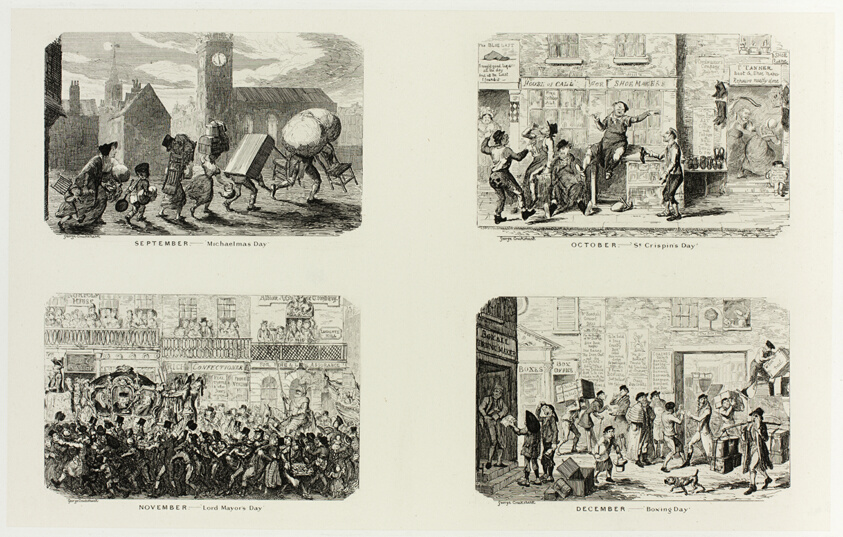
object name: Print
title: September – "Michaelmas Day" from George Cruikshank's Steel Etchings to The Comic Almanacks: 1835-1853 (top left)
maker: George Cruikshank (English, 1792-1878); published by Pickering & Chatto (English, 19th century)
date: 1836, printed c. 1880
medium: Four steel etchings in black on cream India paper, laid down on off-white card (chine collé)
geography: England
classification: etching; paper; print; prints and drawing